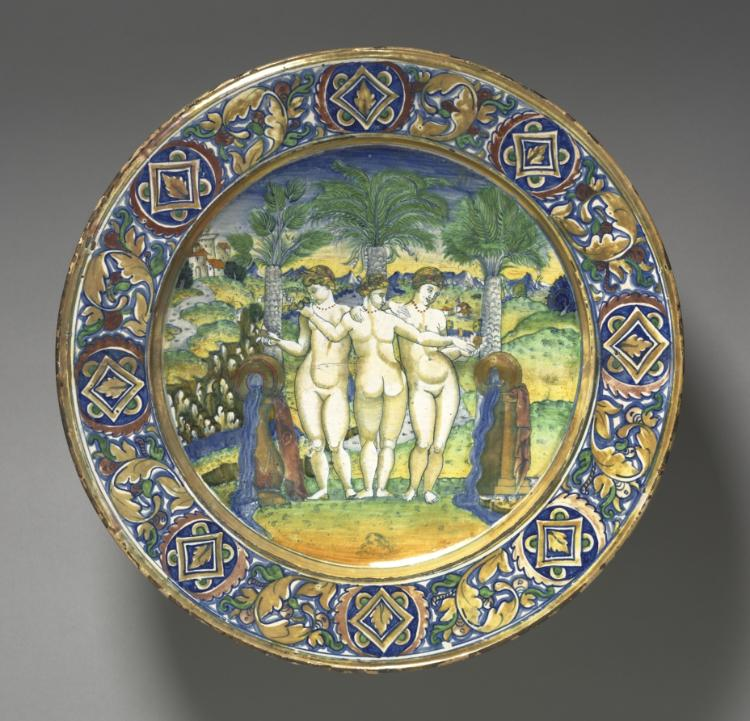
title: Charger Depicting the Three Graces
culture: Italy, Urbino region, Gubbio, 16th century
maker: circle of Maestro Giorgio Andreoli (Italian, 1465?–1553)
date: c. 1525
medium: tin-glazed earthenware with gold lustre (maiolica)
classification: Ceramic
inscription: this plate has been broken and mended; in the repair, signature and date have disappeared. According to catalogue by A. Darcel and A. Basilewsky (Collection Basilewsky, No. 420) name and date were on the plate.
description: During the Renaissance, an understanding of classical antiquity was perceived to be a sign of social, intellectual, and economic distinction. Scenes from Greco-Roman mythology were prominently featured on maiolica, covering the surface in a style called istoriato (decorated with stories). This depiction of the three graces was likely based on an engraving by the Renaissance printmaker, Marcantonio Raimondi.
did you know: In Greek mythology, the three graces represent the daughters of Zeus who embodied charm, beauty, and creativity.